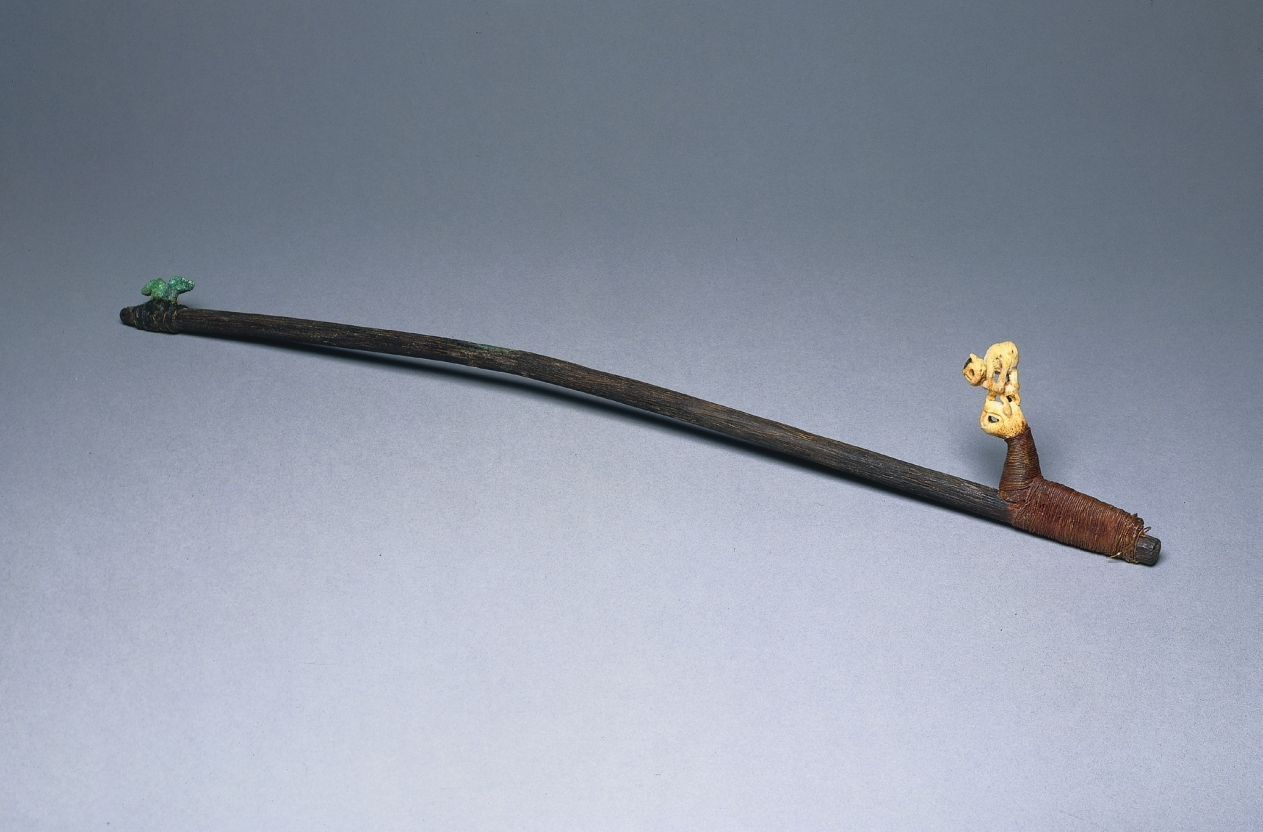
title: Spear-Thrower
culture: Peru, South Coast?, Middle Horizon?, 6th-10th Century?; modern assembly of ancient parts?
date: 600–1000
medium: wood, metal, bone, thread, sinew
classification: Arms and Armor